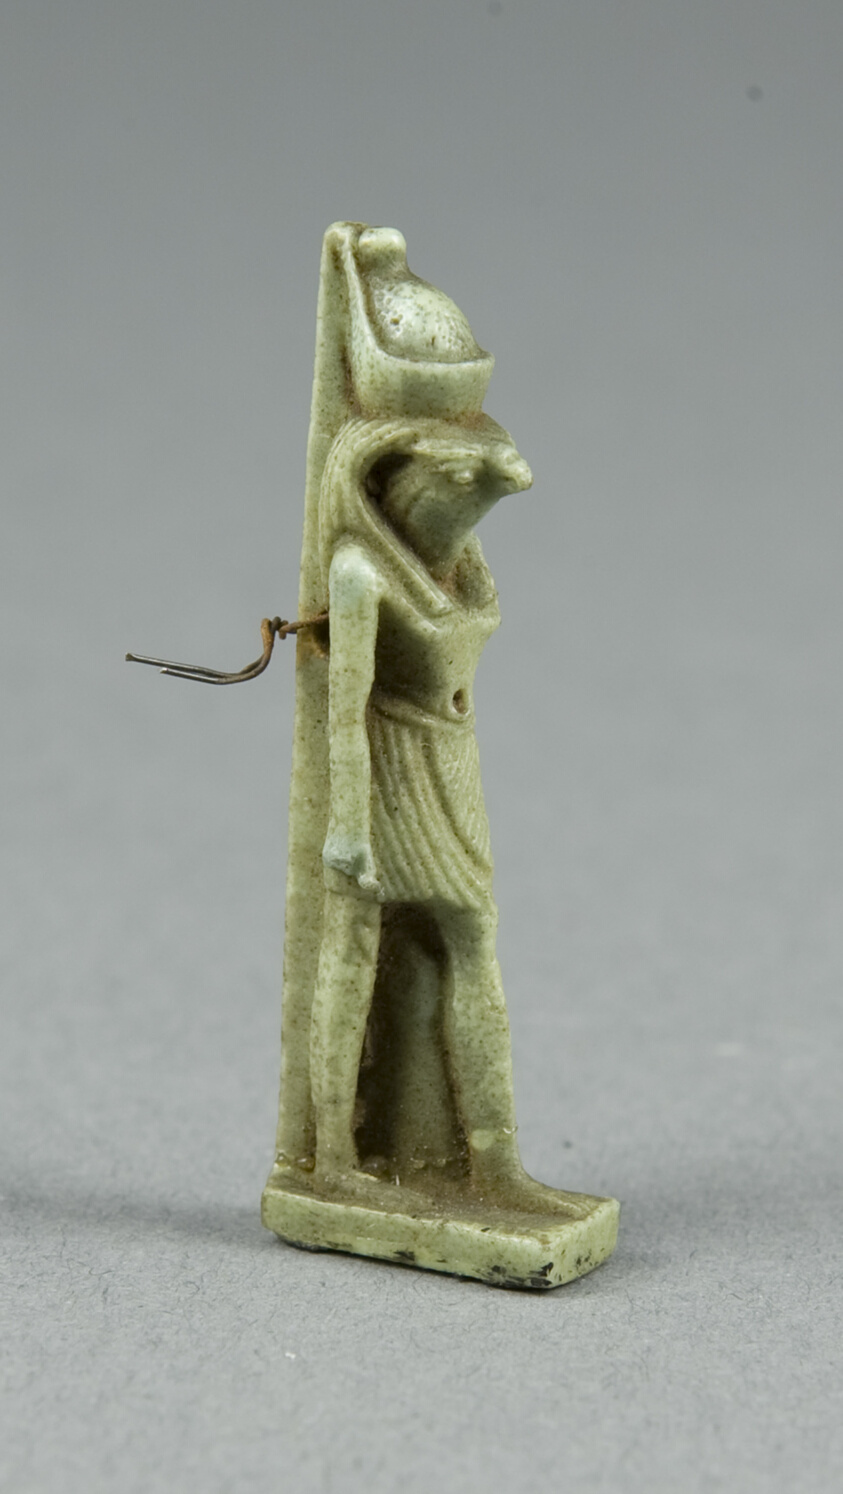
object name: Costume and Accessories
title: Amulet of the God Horus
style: egyptian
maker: Egyptian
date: Third Intermediate Period–Late Period, Dynasty 21–31 (about 1069–332 BCE)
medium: Faience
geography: Egypt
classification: amulet; jewelry; ceramics; ancient art; costume; faïence (composite material)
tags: gods (deities)